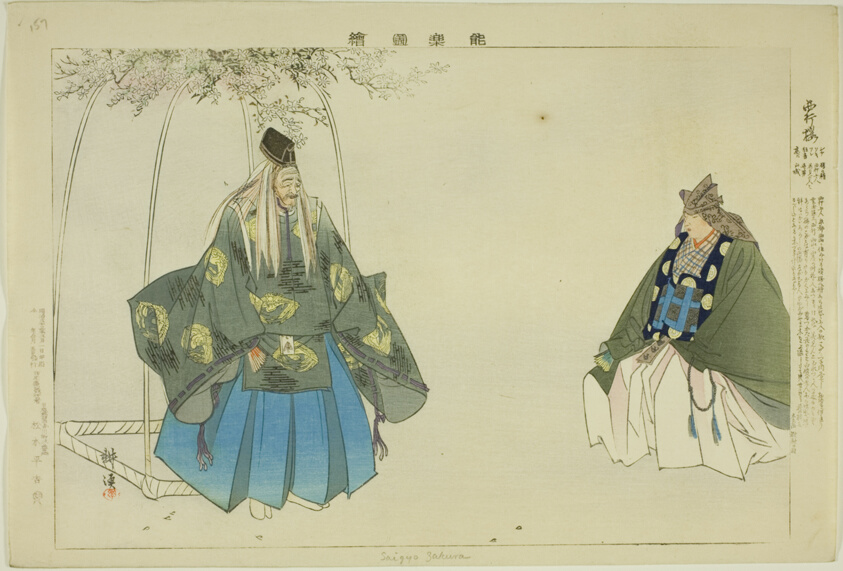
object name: Print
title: Saigyo-zakura, from the series "Pictures of No Performances (Nogaku Zue)"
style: Japanese (culture or style)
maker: Tsukioka Kogyo; Japanese, 1869-1927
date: 1898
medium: Color woodblock print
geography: Japan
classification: woodblock print; print; asian art